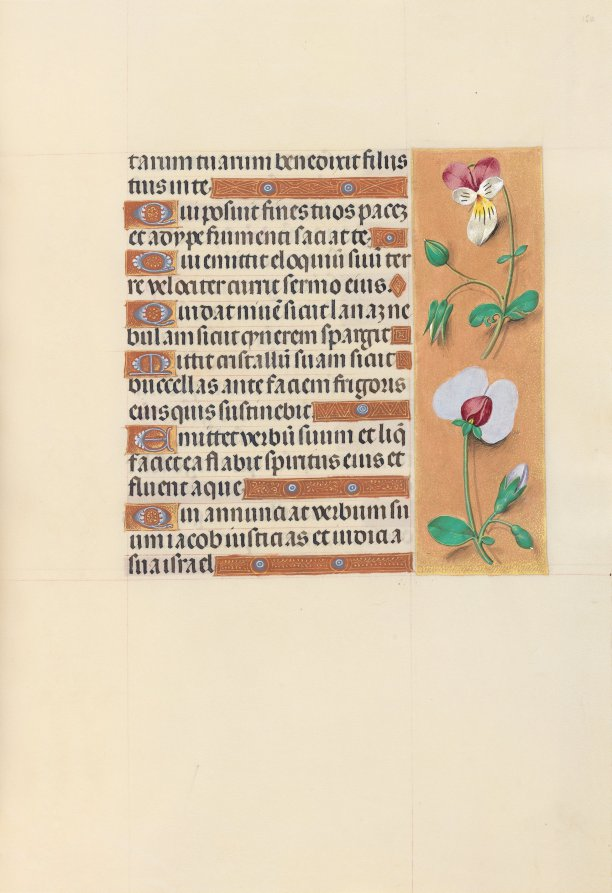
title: Hours of Queen Isabella the Catholic, Queen of Spain: Fol. 150r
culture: Flanders, Ghent and Bruges, late 15th century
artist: Master of the First Prayerbook of Maximillian (Flemish, c. 1444–1519)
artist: and Associates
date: c. 1500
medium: ink, tempera, and gold on vellum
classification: Bound Volume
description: This manuscript was illuminated by a circle of at least five highly organized manuscript painters active in the Flemish cities of Ghent and Bruges. The principal illuminator was Alexander Bening, who painted the majority of the book's miniatures. Manuscripts produced by this circle of artists are renowned for the decoration of their borders, which typically feature a rich variety of realistically-painted flowers, birds, and butterflies. This prayer book, called a book of hours, was intended not for a cleric, but for the private devotions of a lay person-in this case, Isabella the Catholic, Queen of Spain (1451-1504). Isabella's coat of arms embellishes the book's frontispiece. It is unlikely that the book was commissioned by the Queen herself; rather, she probably received it as a diplomatic gift from someone courting her patronage, perhaps Cardinal Francisco Jimenez de Cisneros. A Franciscan friar, Jimenez was dependent upon Isabella for his advancement, first to the post of Queen's confessor in 1492, and then to Archbishop of Toledo in 1495.